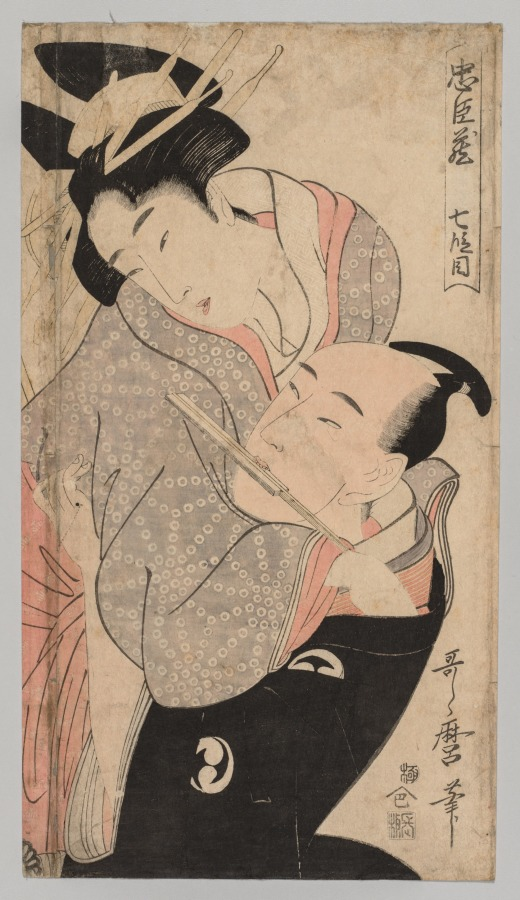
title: Man and Woman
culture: Japan, Edo period (1615–1868)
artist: Kitagawa Utamaro (Japanese, c. 1754–1806)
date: 1753–1806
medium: color woodblock print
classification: Print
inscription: Signature: Utamaro fude